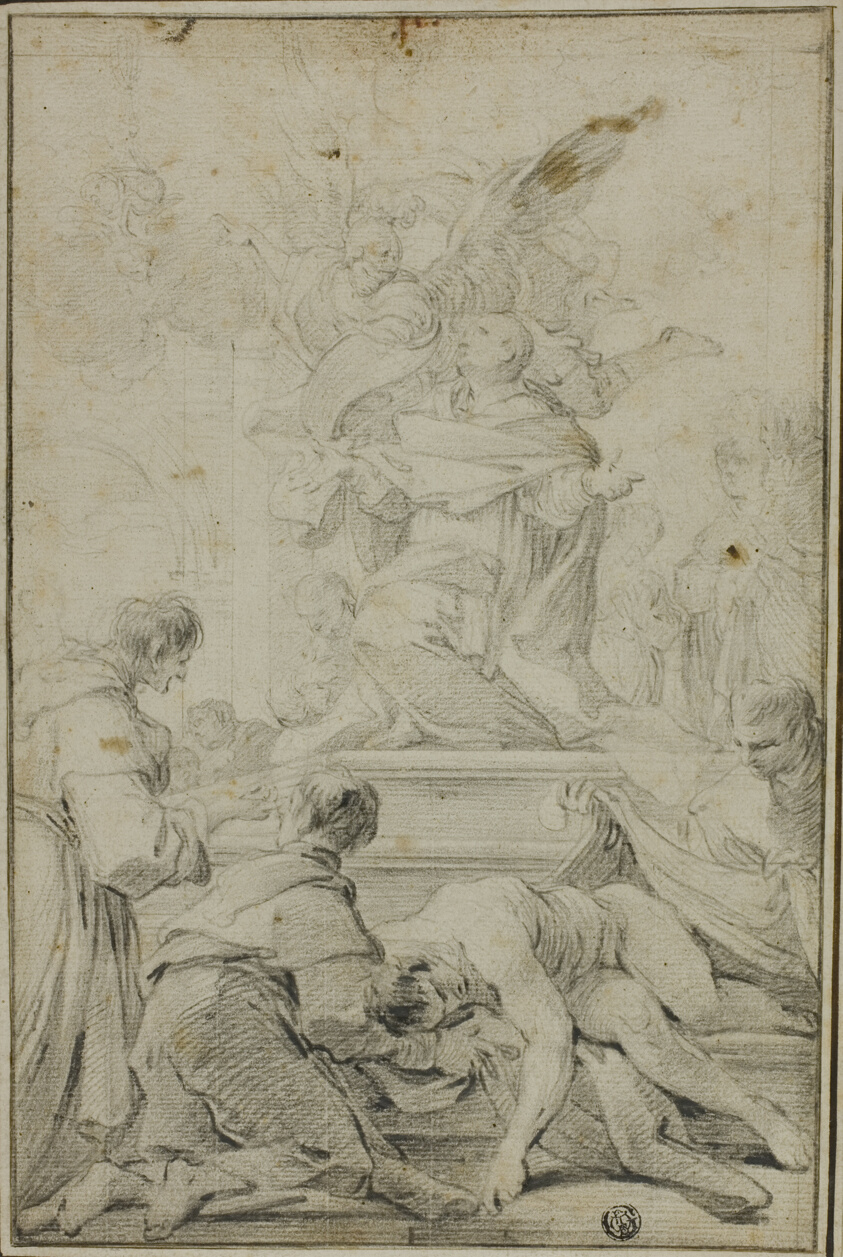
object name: Drawing and Watercolor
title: San Carlo Borraomeo Interceding for Plague Victims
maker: Style of Sebastiano Conca (Italian, 1680-1764); or Corrado Giaquinto (Italian, 1703-1766); or Domenico Tintoretto (Italian, 1560-1635)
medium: Black chalk, heightened with black crayon, on ivory laid paper, laid down on ivory laid paper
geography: Italy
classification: chalk; drawings (visual works); prints and drawing